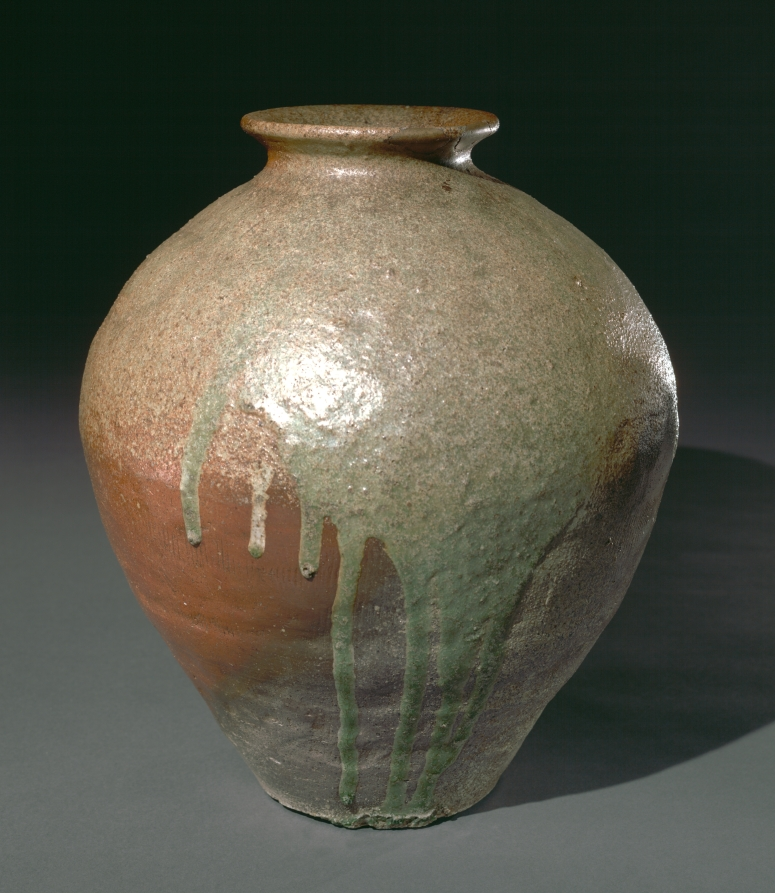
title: Storage Jar: Tamba Ware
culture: Japan, Muromachi period (1392–1573)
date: 1400s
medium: stoneware with natural ash glaze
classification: Ceramic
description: This vessel served as a storage container for rice or other grains in medieval farming communities. The piece was made by potters in Tamba, a fertile region west of Kyoto which used such vessels to send its agricultural products to towns throughout western Japan. Tamba ware is recognized by its warm green glaze, created as accumulations of natural wood ash settle on the clay body and liquefy when the kiln temperature is sufficiently high. The jar's contours reveal that it was built in four stages from many clay coils pressed together by hand. The smooth neck and mouth were wheel-turned. The vertical, incised lines visible on the reddish-brown body indicate where a comb-like tool scraped excess clay from the body wall; this technique helped conserve clay material and wood used in the firing. The scraping also exposes the grittiness of local Tamba clay, which in the 15th century did not undergo an extensive refining process.